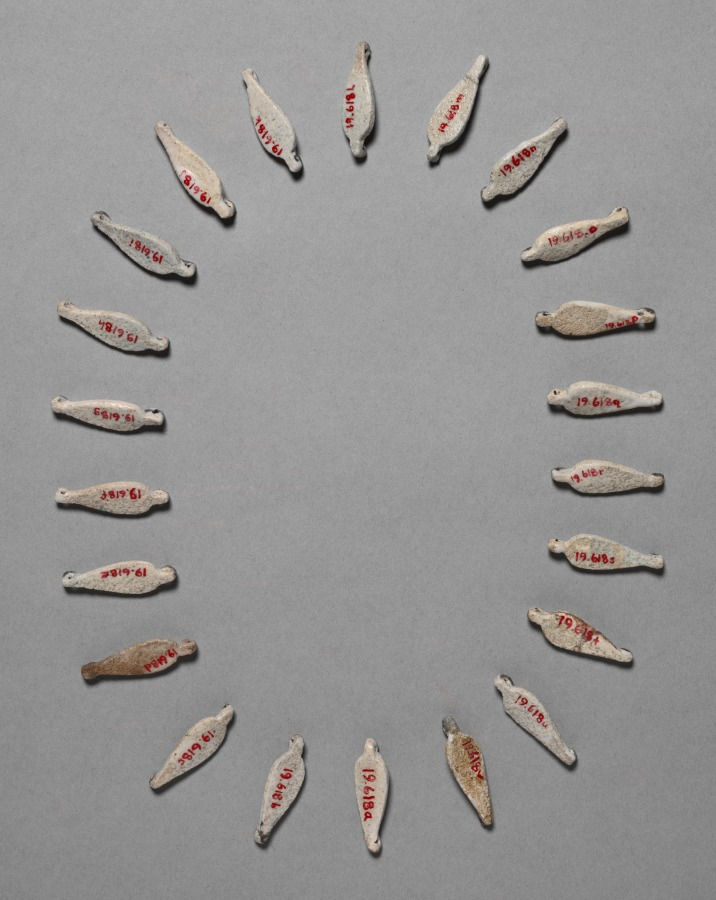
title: Petal-Shaped Beads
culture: Egypt, New Kingdom (1540–1069 BCE), Dynasty 18, reign of Amenhotep III (1390–1352 BCE)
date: c. 1391–1353 BCE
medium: faience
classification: Jewelry